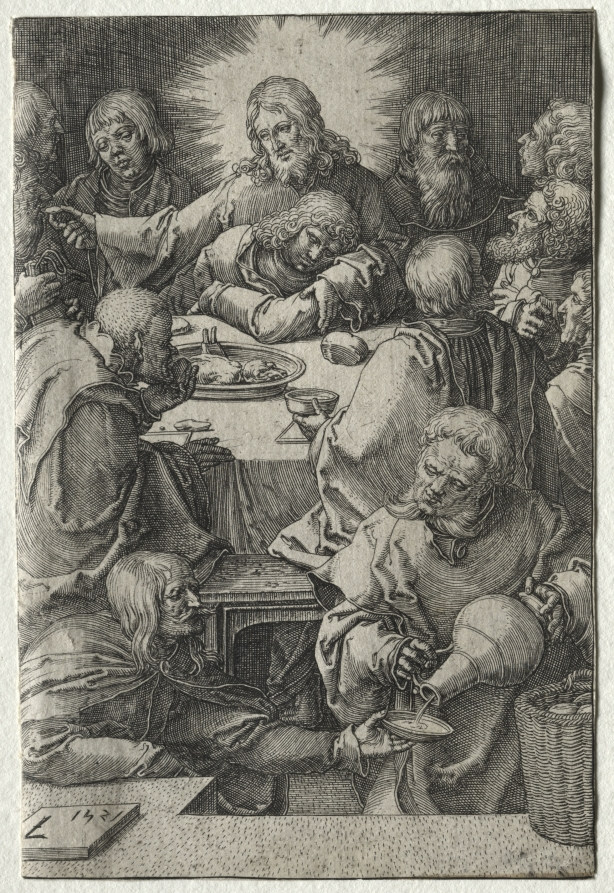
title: The Last Supper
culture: Netherlands, 16th century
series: The Passion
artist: Lucas van Leyden (Netherlandish, 1494–about 1533)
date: 1521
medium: engraving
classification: Print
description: In this compact scene, Lucas van Leyden offered a condensed view of the Last Supper, focusing on Christ and Saint John—the Beloved Apostle—on the far side of the table and Judas—the apostle who would betray Christ—on the near side. Wine flows freely, mixing hints of its symbolic significance with a certain hunger for drink as shown by the disciple who receives a replenishment in the foreground. The artist may have seen or owned the 1510 woodcut by Albrecht Dürer, borrowing elements such as the vertical format, Christ’s relationship to John, and the platter on the table but rendering them in reverse and with fewer overall figures.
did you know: This image is smaller than most smart phones, inviting the viewer to lean in and look closely.